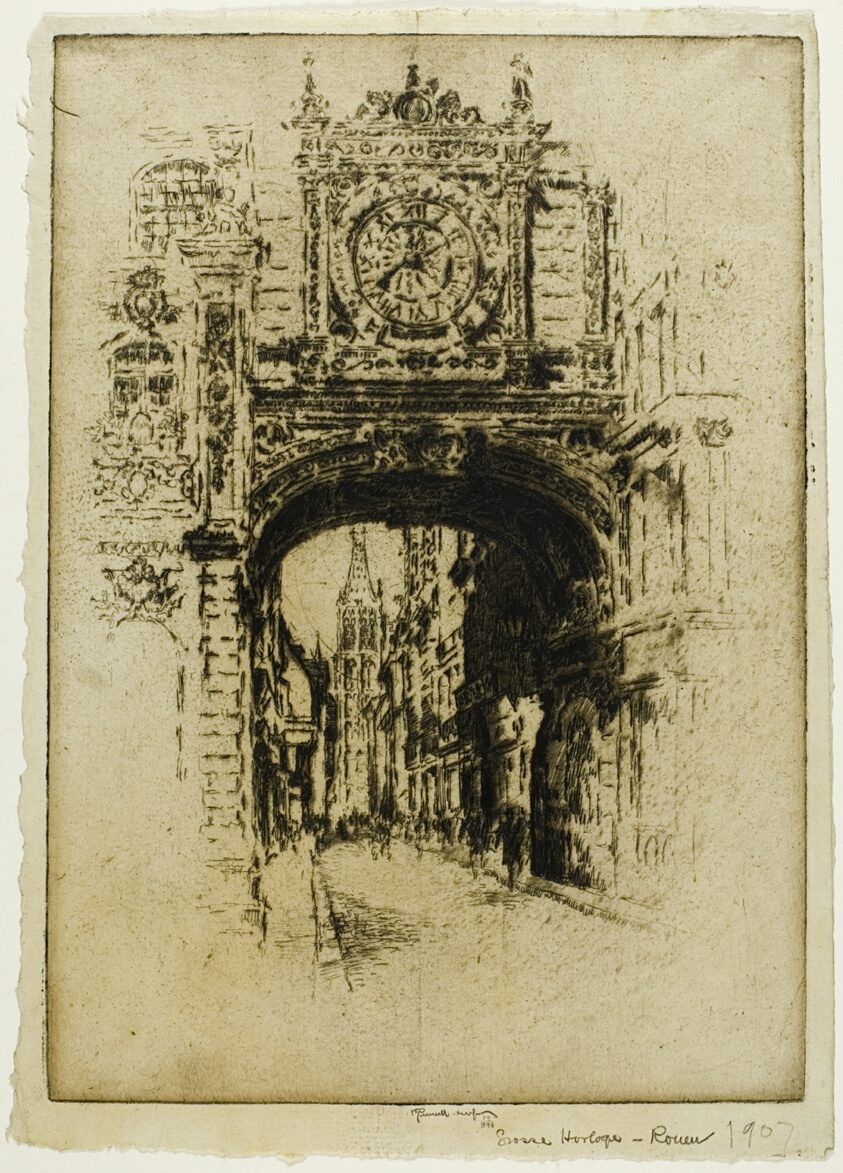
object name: Print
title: Grosse Horloge, Rouen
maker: Joseph Pennell (American, 1857-1926)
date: 1907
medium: Etching on ivory laid paper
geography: United States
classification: etching; print; prints and drawing